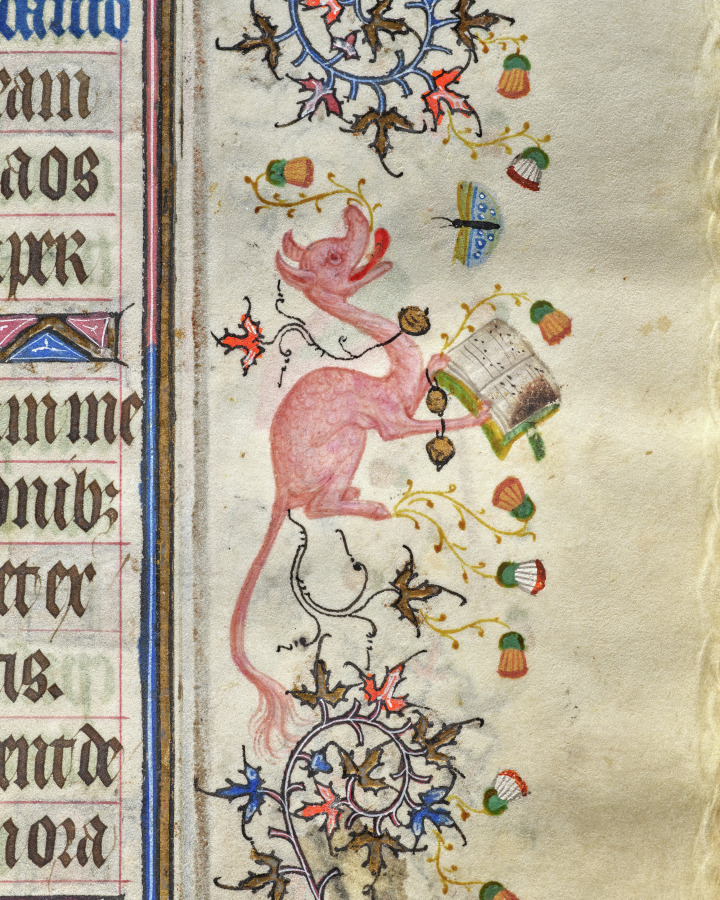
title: Hours of Charles the Noble, King of Navarre (1361-1425): fol. 174r, Text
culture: France, Paris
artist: Master of the Brussels Initials and Associates (French)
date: c. 1405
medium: ink, tempera, and gold on vellum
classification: Bound Volume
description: This precious volume was obviously highly prized by its owner, the French-born King of Navarre, who had his coat of arms painted on no less than twenty folios. Rather than directly commissioning this manuscript from a specific workshop, it seems that Charles the Noble acquired his book of hours -- perhaps ready-made for the luxury market -- while on a trip to Paris in 1404-05. A collaborative effort, six painting styles are evidenced within the pages of this codex, those of two Italians, two Frenchmen, and two Netherlanders. The painter who was responsible for the planning and decoration of the book, and who produced seventeen of the large miniatures, was a Bolognese artist known as the Master of the Brussels Initials. His principal assistant, responsible for most of the borders, was a Florentine who signed his name "Zecho" da Firenze on folio 208 verso.